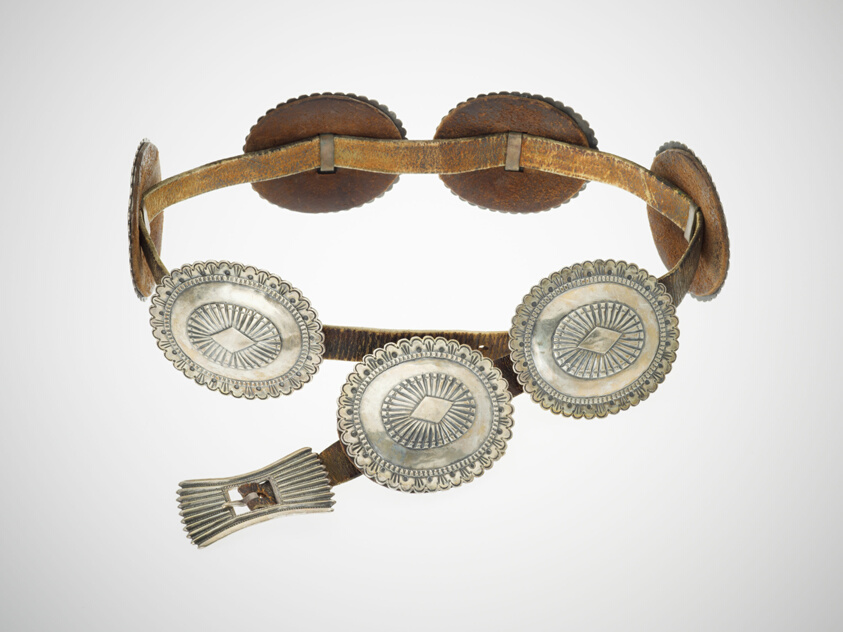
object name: Costume and Accessories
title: Concho Belt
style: navajo, dine, americas, native american, native north american, Arts of the Americas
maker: Navajo (Diné) (Northern New Mexico or Arizona, United States)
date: 1880s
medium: Silver and leather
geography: New Mexico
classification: belts (costume accessory); art of the americas; costume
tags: costume, geometric, silver (color), ornaments